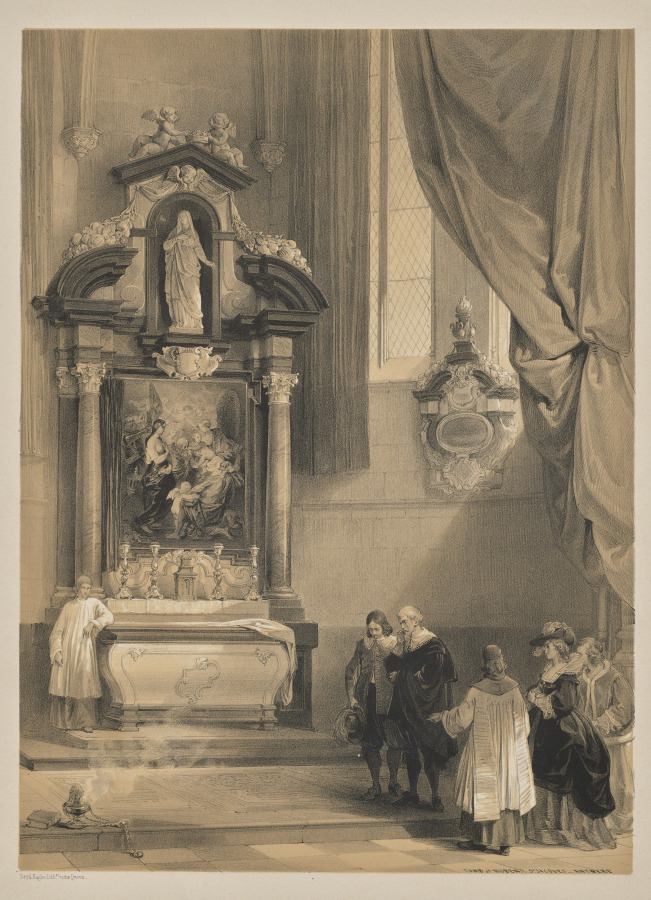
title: Sketches in Belgium and Germany, Second Series: No. 26 - Tomb of Rubens, St. Jacques, Antwerp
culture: England, 19th century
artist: Louis Haghe (British, 1806–1885)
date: 1845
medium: lithograph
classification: Print